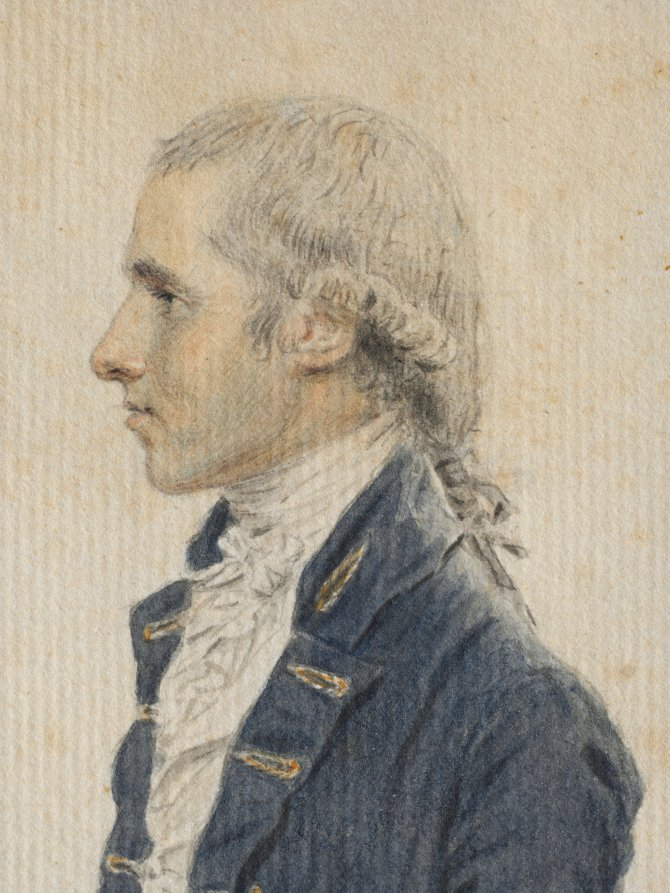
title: Portrait of Sir Captain West of the Dutton Indiaman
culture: England, 18th century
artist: John I Smart (British, 1741–1811)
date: 1785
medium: watercolor over traces of black chalk, with metallic gold paint on laid paper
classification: Portrait Miniature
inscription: by artist, across bottom, in brown ink: Captain West of the Dutton Indiaman 1785 / drawn on board going to Madras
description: Smart painted Captain West’s head in profile, turned to the right. His powdered hair is worn en queue with curls above his ears and white powder on his shoulders. He has long eyelashes, parted lips, and a grayish cast to his skin tone, particularly over his beard. West dons a blue coat with gold buttonholes embroidered in gold and a white waistcoat, high collar, and cravat tied in a small bow. This work is a finished drawing by Smart, evidenced in part by its larger size and by the fact that the painting of the sitter’s clothing is complete and the bust is placed within an elaborate border comprised of blue, metallic gold, and gray lines. This finished quality does not preclude the possibility that the drawing may also have functioned as a preparatory sketch for a miniature on ivory, which has not been located. Captain James West sailed the Dutton Indiaman from England to Madras, India, on several occasions, including Smart’s voyage in 1785. At least one of the sons of British judge Sir Elijah Impey was traveling with Smart on his journey to India and had his portrait taken by the artist. Another of Impey’s sons wrote of an earlier return passage to England made with Captain West in 1784, shedding light on the sea captain’s character and disposition. Impey’s account conveys not only West’s personality but the atmosphere that prevailed on the ship over which the captain presided and on which Smart traveled and worked. As indicated by an inscription in the artist’s hand, this portrait was painted by Smart while he was aboard the Dutton en route to Madras and probably retained by the artist as a memento. In addition to the portrait of “Master Impey,” Smart is known to have taken the likeness of other figures while aboard the Dutton, including the quartermaster “Baker” and a French ship called the Consalateur, which was intercepted by the Dutton while sailing to India. The current location of both works is unknown.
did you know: In 1784 it was written that "Captain James West, had the just reputation of being a first-rate mariner, a well-informed, and thoroughly practical man of business, and in every way worthy of confidential intimacy."